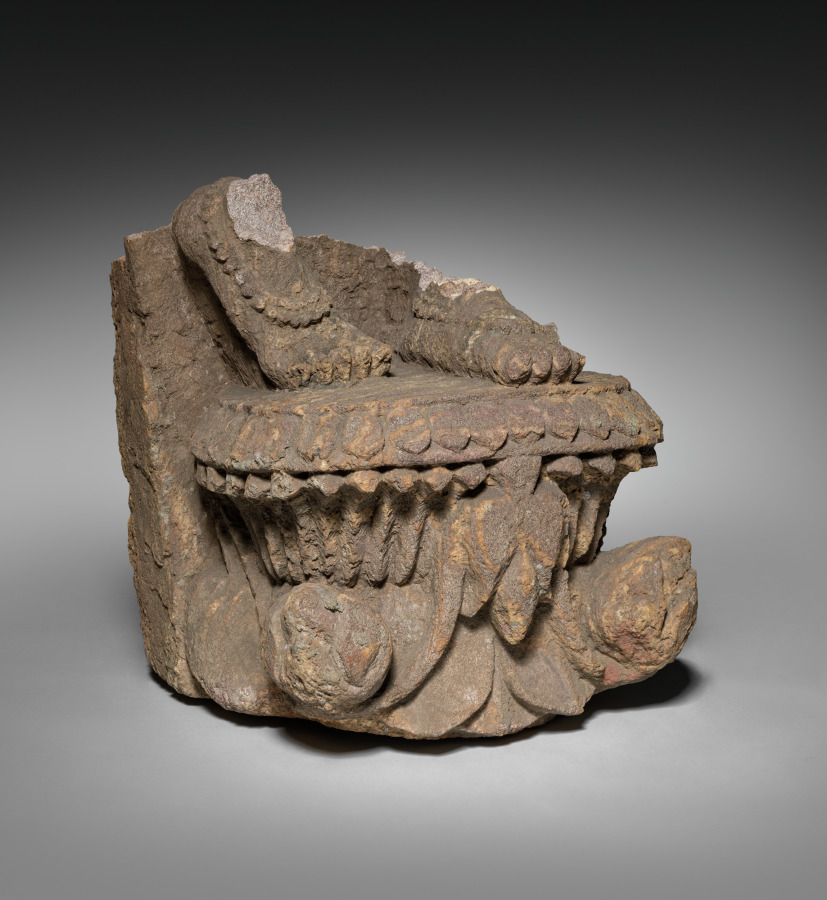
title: Base and Feet of Devata or Yakshi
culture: India, Province of Orissa, 20th century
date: 20th century fake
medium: sandstone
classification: Sculpture